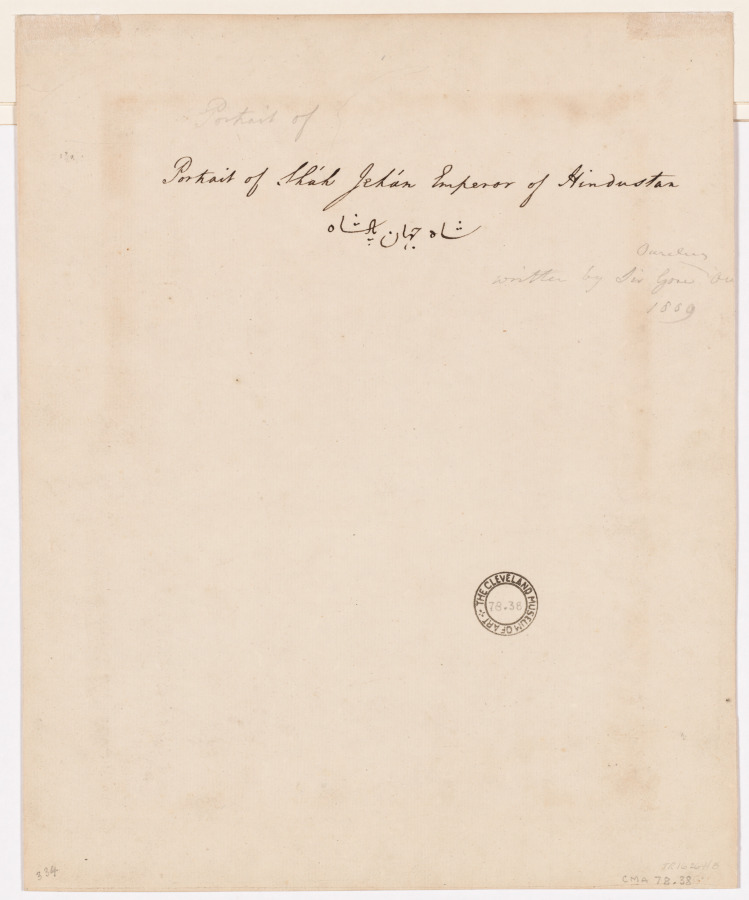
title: Shah Jahan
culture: Netherlands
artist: Rembrandt van Rijn (Dutch, 1606–1669)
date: c. 1656–61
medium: pen and brown ink and brush and brown wash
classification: Drawing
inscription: On verso of secondary support, upper center, in graphite: Portrait of; upper center, in brown ink: Portrait of Sháh Jahán Emperor of Hindustan [inscription in English] / Shah Jahan Padshah [inscription in Persian]; upper right, in graphite: Ouseley / written by Sir Gore Ou[seley] 1809; lower left, in graphite: 334; fragment of old mount (now removed), in blue pencil: 3[crossed out with black ink]; fragment of old mount (now removed), in gray ink: Portrait of Sháh Jehán / Emperor of Hindûstan; in black ink: 5[written over 5 in graphite] Indian Prince [underlined]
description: Rembrandt’s drawing portrays Shah Jahan, the ruler of the Mughal Empire from 1628-58. It is one of twenty-three drawings that Rembrandt made after Indian miniatures, which he had very likely studied in an album then in Holland. By the 18th century, the album had been dismantled, and the model for this drawing now resides at the Schloss Schönbrunn, Vienna. Rembrandt imposed his characteristic realist tendencies on a more detailed, formal, and stylized model, bringing the shah to life with especially fine pen strokes on the face and shoes mixed with evanescent brown ink washes around the figure that introduce a dynamic interplay of light, shade, and figure. Above the shah’s head, he scratched away parts of the ink and paper to create a nimbus shape that frames the profile. His meticulous technique and use of a rare and expensive Japanese paper suggest that he regarded his drawings after Mughal paintings as exceptional.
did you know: The Mughal ruler portrayed in this drawing carries a fly swatter in his left hand.